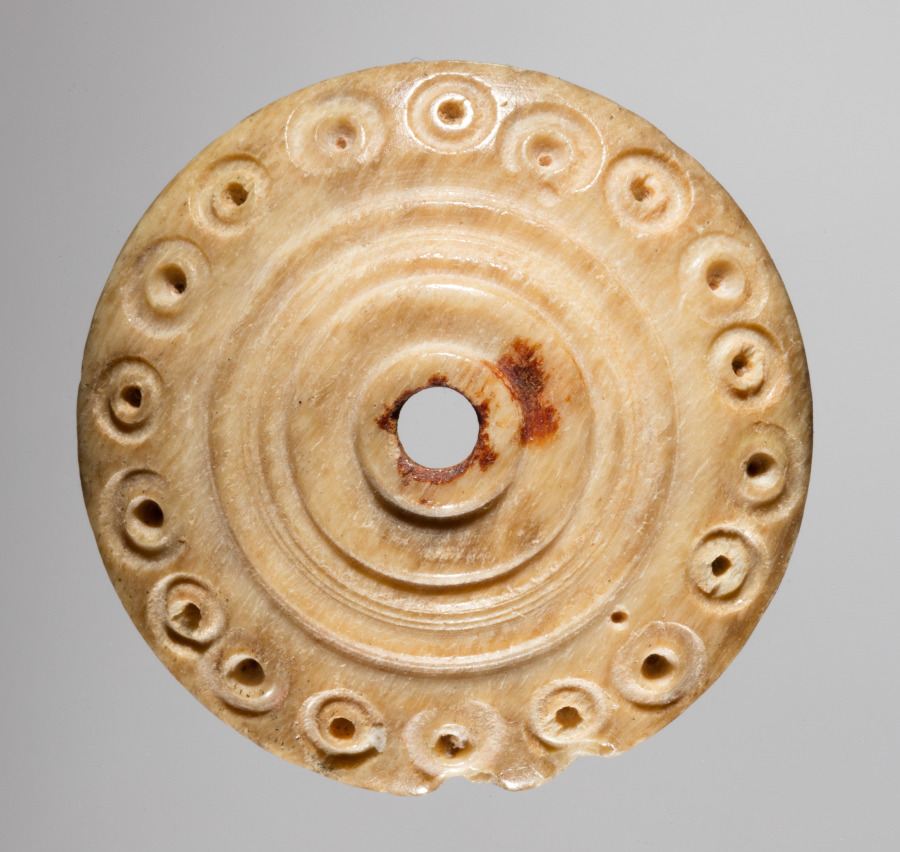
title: Spindle Whorl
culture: Iran, early Islamic period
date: 700s - 900s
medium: bone, incised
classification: Spindle Whorl